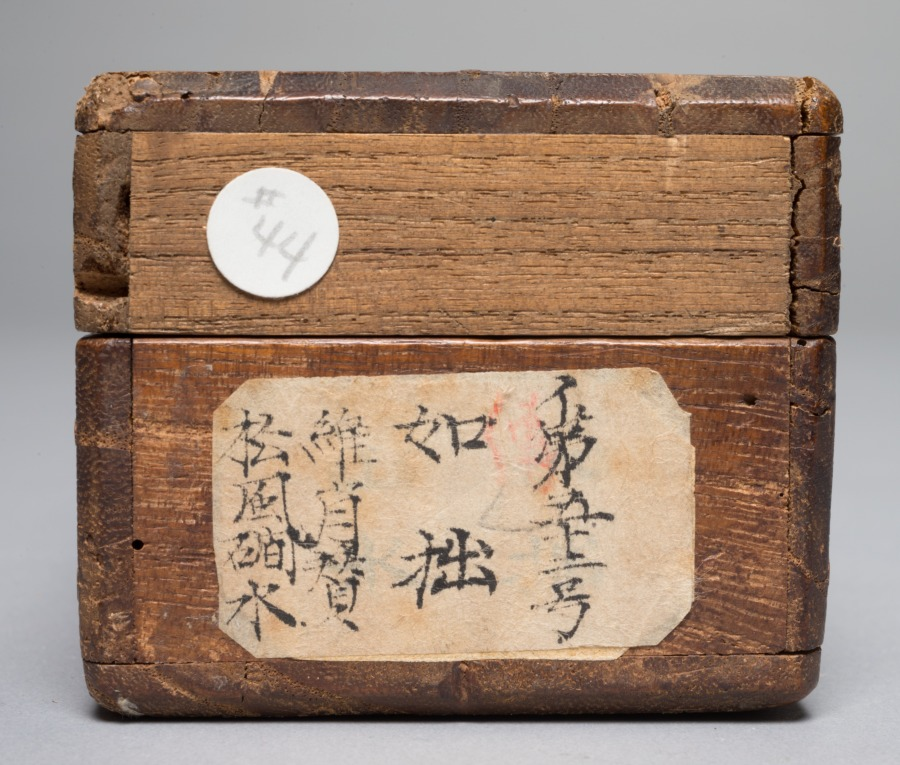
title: Landscape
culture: Japan, possibly Edo period (1615-1868)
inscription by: copy after Ishō Tokugan (Japanese, c. 1359–1437)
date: early 1600s to mid-1800s?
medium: hanging scroll; ink and slight color on paper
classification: Painting